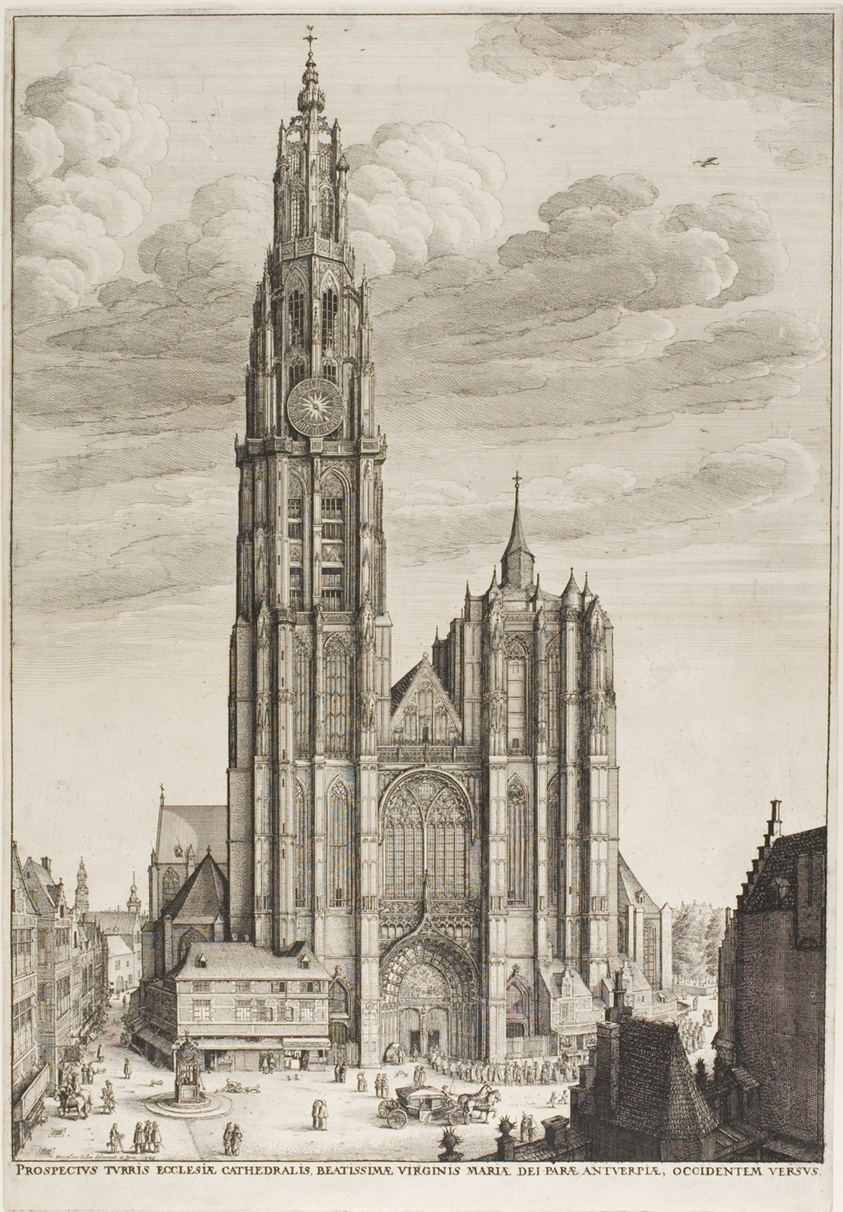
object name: Print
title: Antwerp Catherdral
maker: Wenceslaus Hollar (Bohemian, 1607-1677)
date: 1649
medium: Etching on ivory laid paper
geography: Bohemia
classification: etching; print; prints and drawing